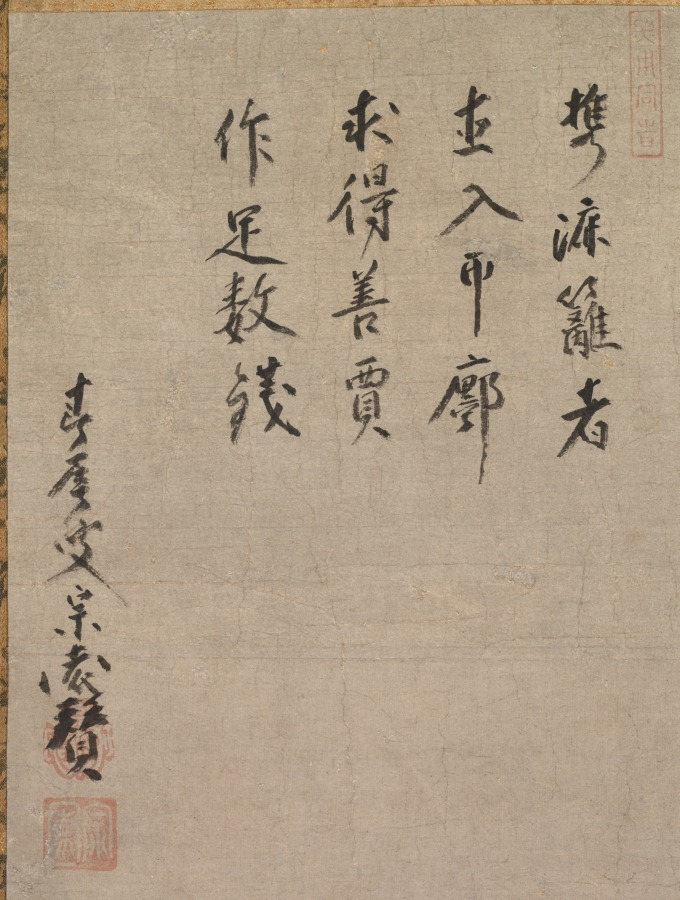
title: Rei Shōjo (Ling Zhaonu)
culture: Japan, Muromachi period (1392–1573)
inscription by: Shunoku Sōen (Japanese, 1529–1611)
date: 1500s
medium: hanging scroll, ink and light color on paper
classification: Painting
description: Legend has it that Chinese beauty Ling Zhaonu, whose name is pronounced Rei Shōjo in Japanese, was a model of devotion to her parents. She put great effort into selling baskets made by her elderly father, a devout Buddhist, thereby keeping the family afloat financially. The verse on the painting relates her story, and was inscribed by a Zen monk.